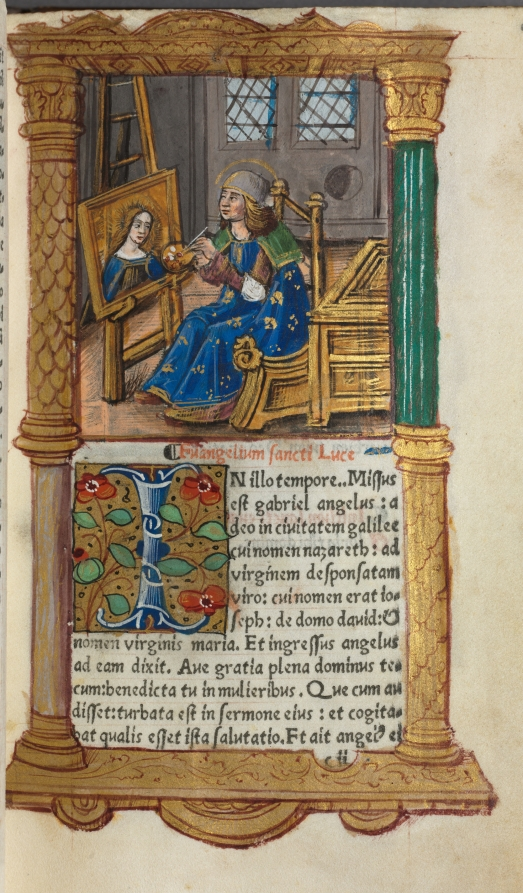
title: Printed Book of Hours (Use of Rome): fol.18r, St. Luke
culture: France, Paris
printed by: Guillaume Le Rouge (French, Paris, active 1493–1517)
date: 1510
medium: 112 Printed folios on parchment, bound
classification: Bound Volume